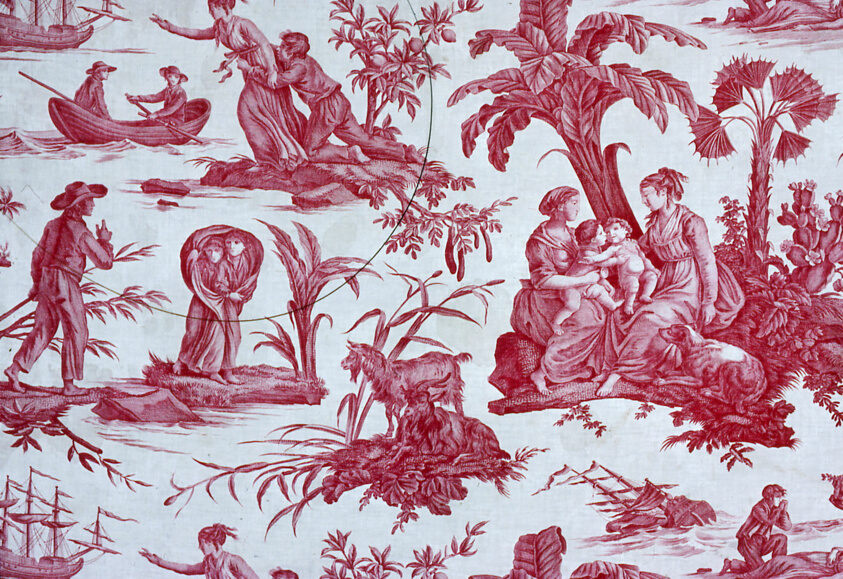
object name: Textile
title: “Paul and Virginie” Furnishing Fabric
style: jouy-en-Josas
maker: Designed by Jean Baptiste Huet (French, 1745–1811) after engraving by Abraham Girardet (Swiss, 1764-1823) after drawing by Jean-Michel Moreau the Younger (French, 1741-1841); Based on the story by Bernardin de Saint-Pierre (French, 1737-1814); Manufactured by Christophe-Philippe Oberkampf (naturalized French, 1738-1815), Oberkampf Manufactory (French, 1760-1843); Jouy-en-Josas, France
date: 1802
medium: Cotton, plain weave; copperplate printed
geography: Jouy-en-Josas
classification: weaving - printed; textile; printed textile; furnishing textile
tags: children, animals, babies, cactus, dogs, goats, people, ships, trees